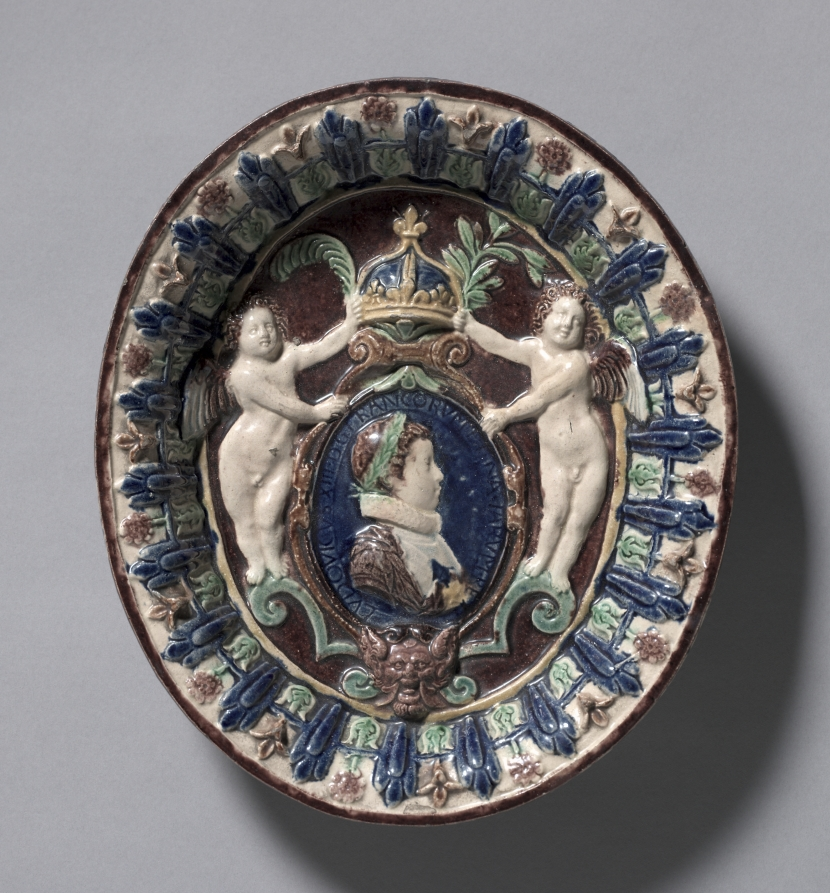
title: Oval Dish Commemorating the Ascent of the Young Louis XIII to the Throne of France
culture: France, 17th century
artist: school of Bernard Palissy (French, 1510–1589)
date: c. 1610–1615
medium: earthenware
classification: Ceramic